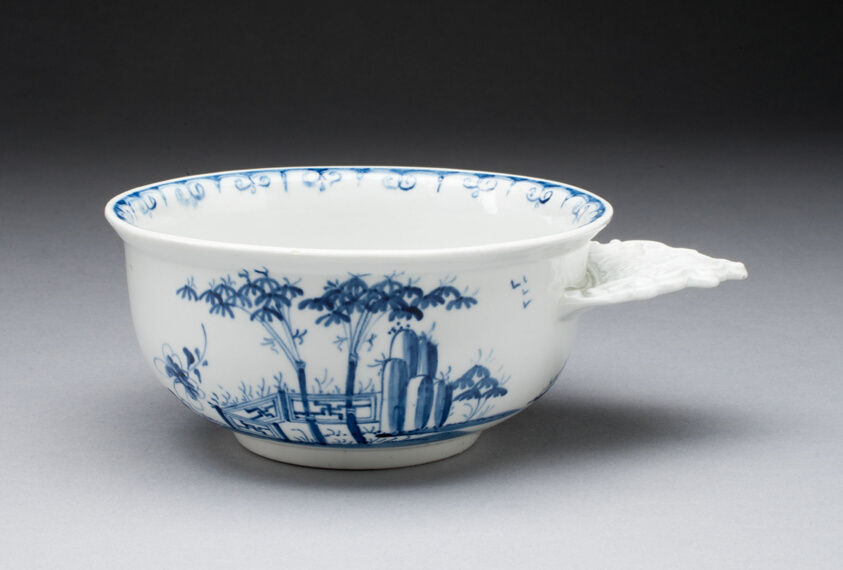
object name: Ceramics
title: Porringer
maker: Worcester Porcelain Factory (Warmstry House Period, 1751–1783); Worcester, England, founded 1751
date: c. 1755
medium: Soft-paste porcelain, underglaze blue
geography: Worcester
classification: porcelain; european decorative arts; ceramics